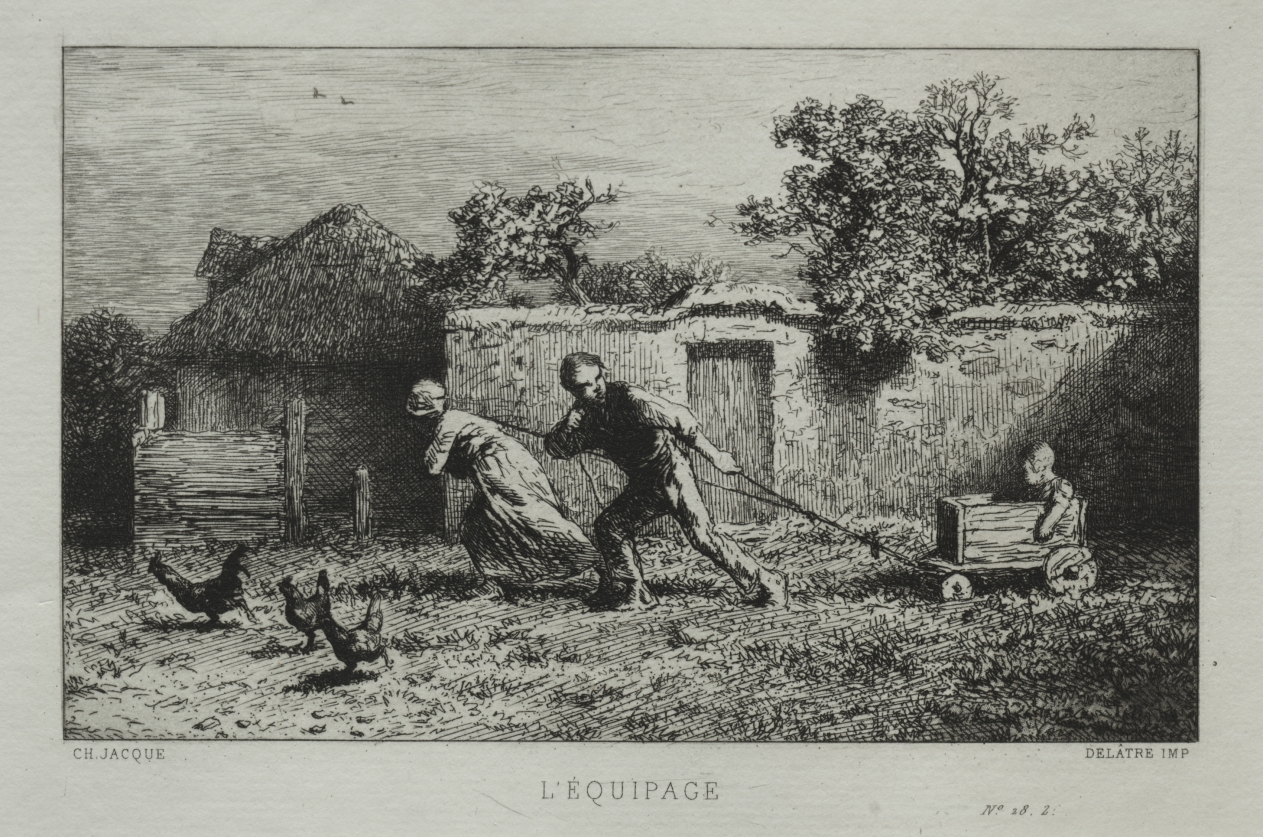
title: The Crew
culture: France, 19th century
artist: Charles-Émile Jacque (French, 1813–1894)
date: 1865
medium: etching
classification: Print